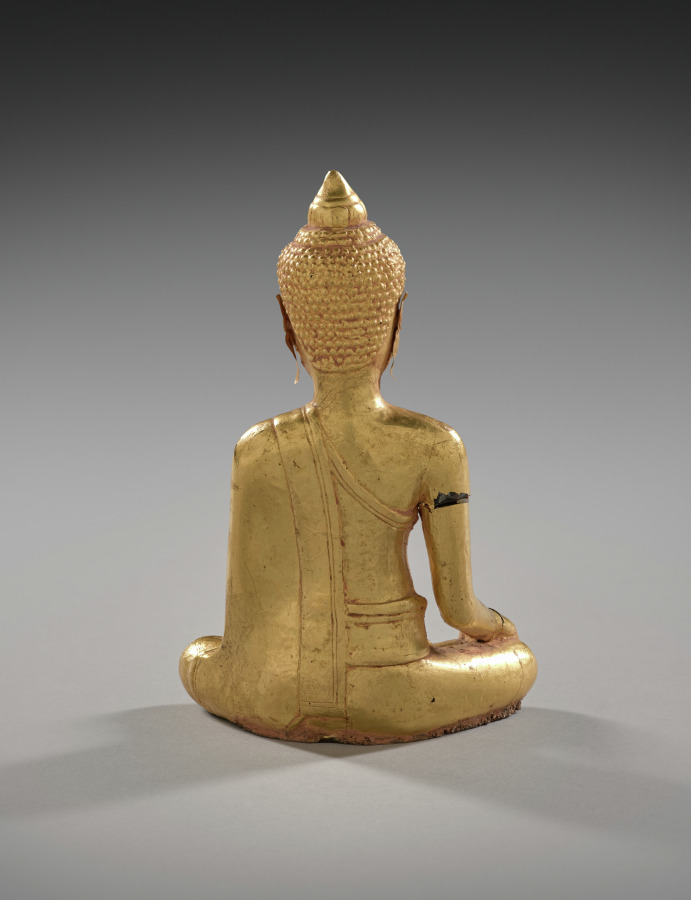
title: Seated Buddha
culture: Thailand, Ayutthaya, Wat Ratchaburana, 14th century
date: before 1424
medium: gold with resin core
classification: Sculpture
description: This pristinely modeled Buddha was fashioned from a sheet of 24-karat gold, using the repoussé (hammering) technique. The figure is filled inside with a resin core. The style is typical of the last phase of Khmer art (800s–1400s), the Lapburi style, which combines characteristics of both Cambodian and Thai sculptural styles.